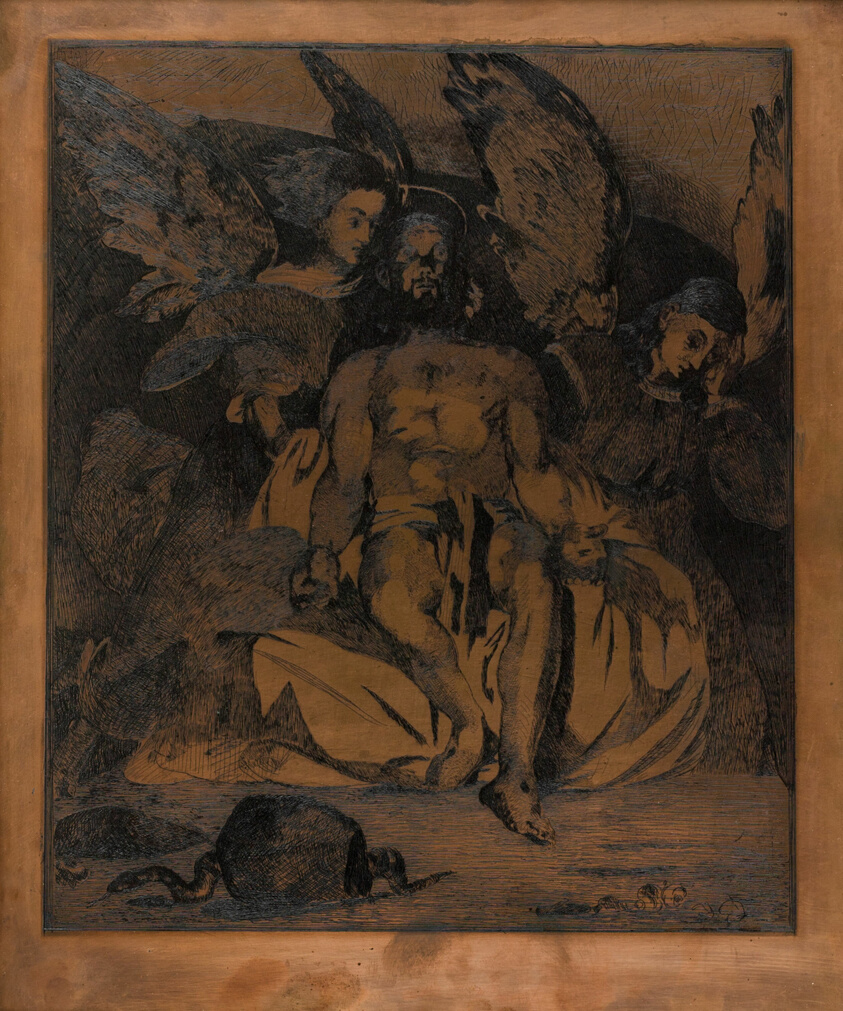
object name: Print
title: Dead Christ with Angels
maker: Édouard Manet (French, 1832-1883)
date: 1866-67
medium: Copperplate, etched and aquatinted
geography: France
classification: etched plate; matrix; prints and drawing; print